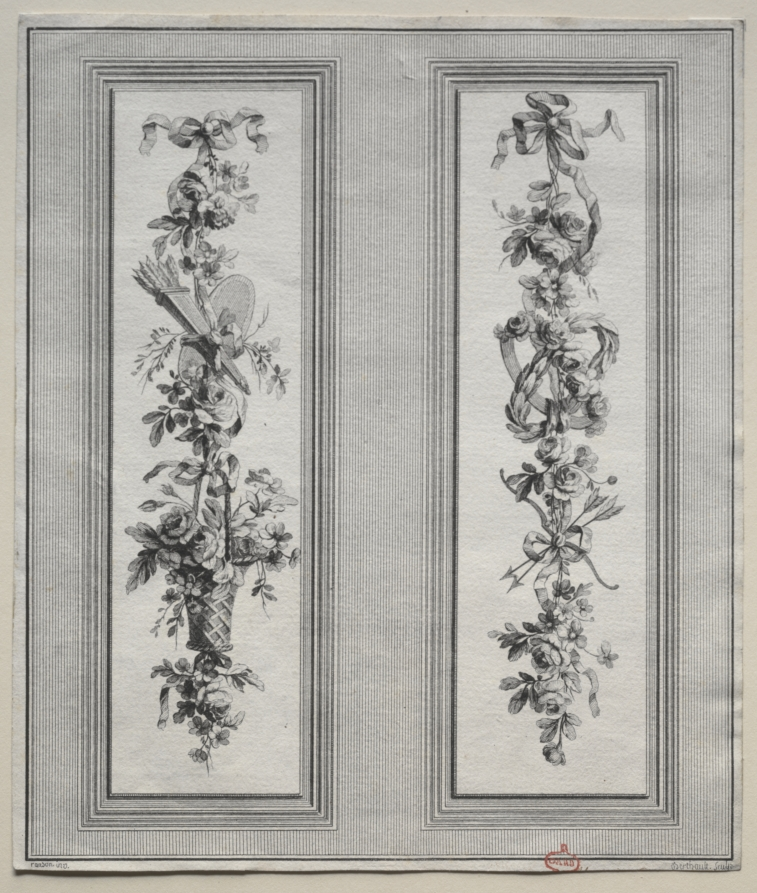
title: Garden Ornament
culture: France, 18th century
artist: Pierre Gabriel Berthault (French, 1748–1819)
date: c. late 1700s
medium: engraving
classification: Print